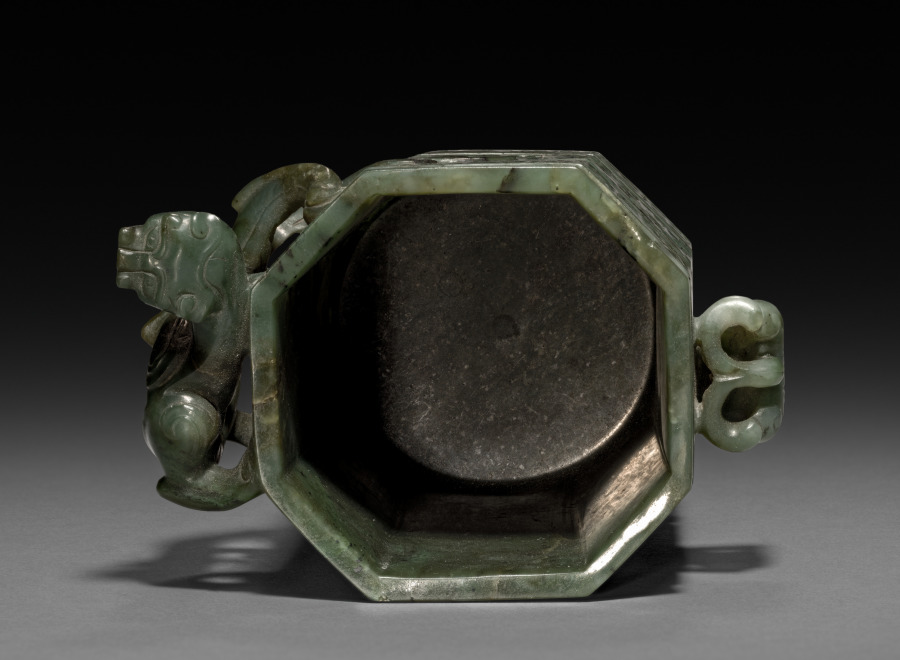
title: Octagonal Ewer with Dragon Handle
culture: China, Qing dynasty (1644–1911), Qianlong reign (1736–95)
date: 1736–95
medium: jade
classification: Jade